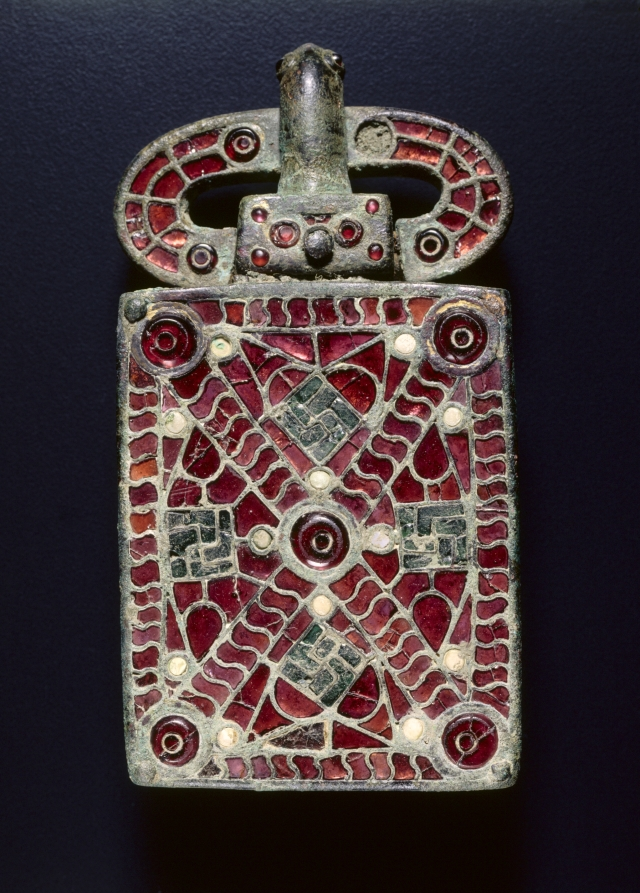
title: Belt Buckle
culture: Visigothic, Spain, Migration Period, 6th century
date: c. 525–560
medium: bronze with garnets, glass, mother of pearl, gold foil, traces of gilding; bronze and glass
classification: Jewelry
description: The art of the European Migration Period (3rd-7th centuries AD) is almost exclusively one of personal adornment-a portable art that followed men and women to their graves. Belt buckles with large rectangular attachment plates have been discovered in cemeteries across the Iberian Peninsula-now occupied by Spain and Portugal-from the period of Visigothic occupation (about AD 412-711). Their decoration varies. Finer examples, like this one, are distinguished by brilliantly inlaid semi-precious stones and colored glass. Garnets were especially prized in Visigothic society for use in cloisonné jewelry. The technique involved the fitting of carefully cut pieces of polished garnet into an intricate grid of compartments, or cloisons. This buckle is so densely inlaid with garnets that it presents a virtual "carpet" of red to the eye. These large Visigothic buckles are strikingly uniform in shape yet endlessly varied in surface design, perhaps a sign that they expressed the personal identities of their original owners. Grave excavations have shown that belt buckles of this type were made for women.